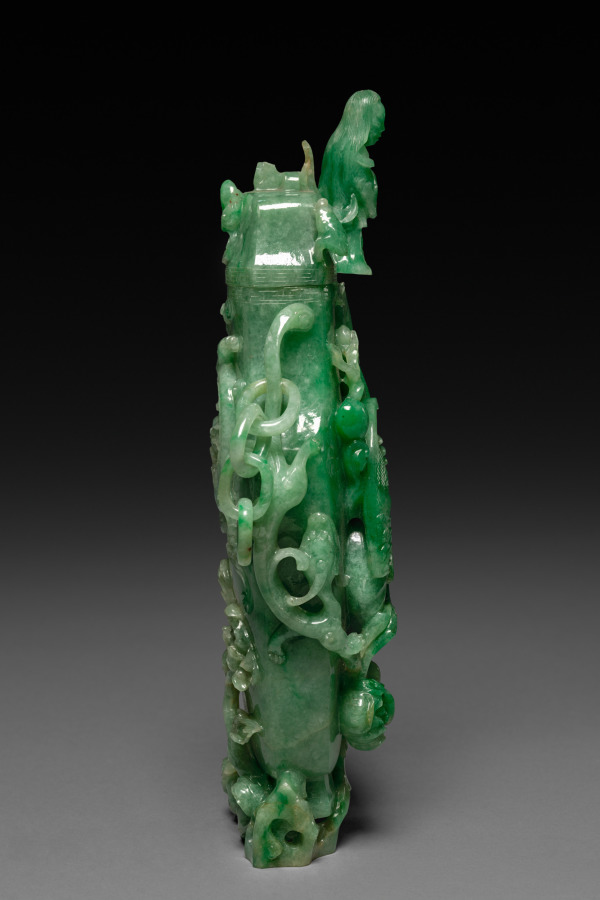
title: Three-Sectional Altar Group: Cylindrical Carving with Phoenix (lid)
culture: China, Qing dynasty (1644-1911)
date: 1644–1911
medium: jade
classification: Jade